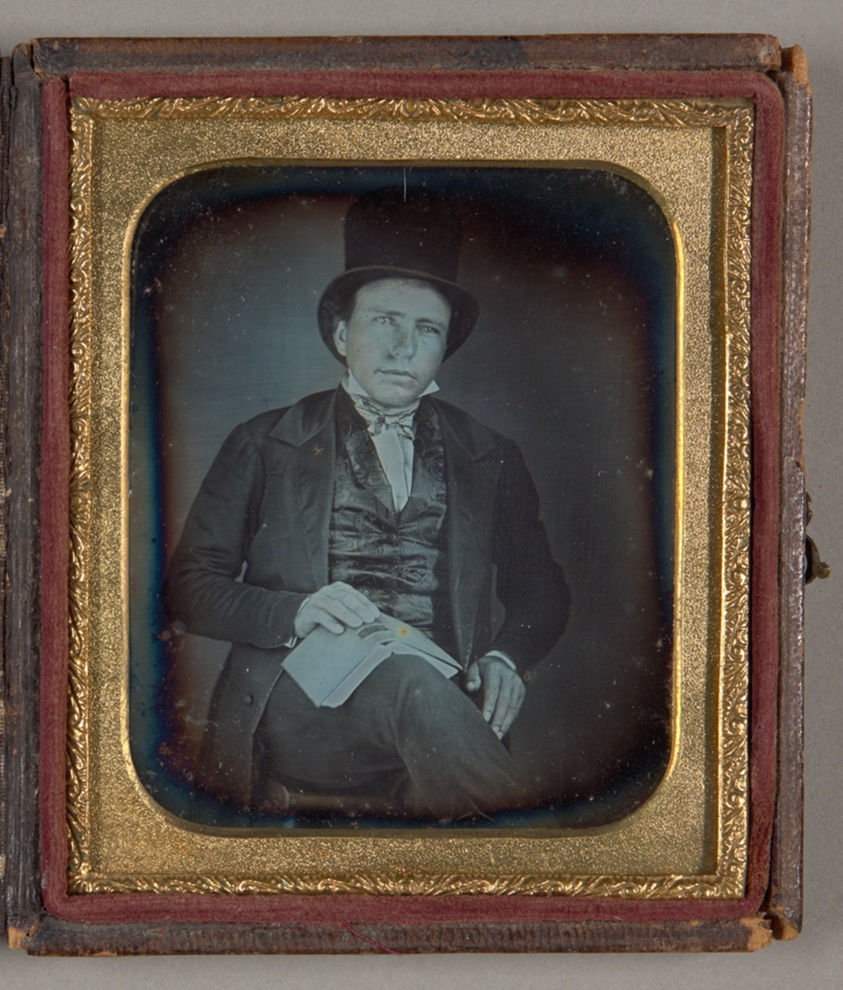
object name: Photograph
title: Untitled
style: 19th century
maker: Artist unknown; 19th century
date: 1853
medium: Daguerreotype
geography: Unknown Place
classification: daguerreotype; photographic process; photography; photograph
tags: portraits, portraits: male subject, photography, formal portraits